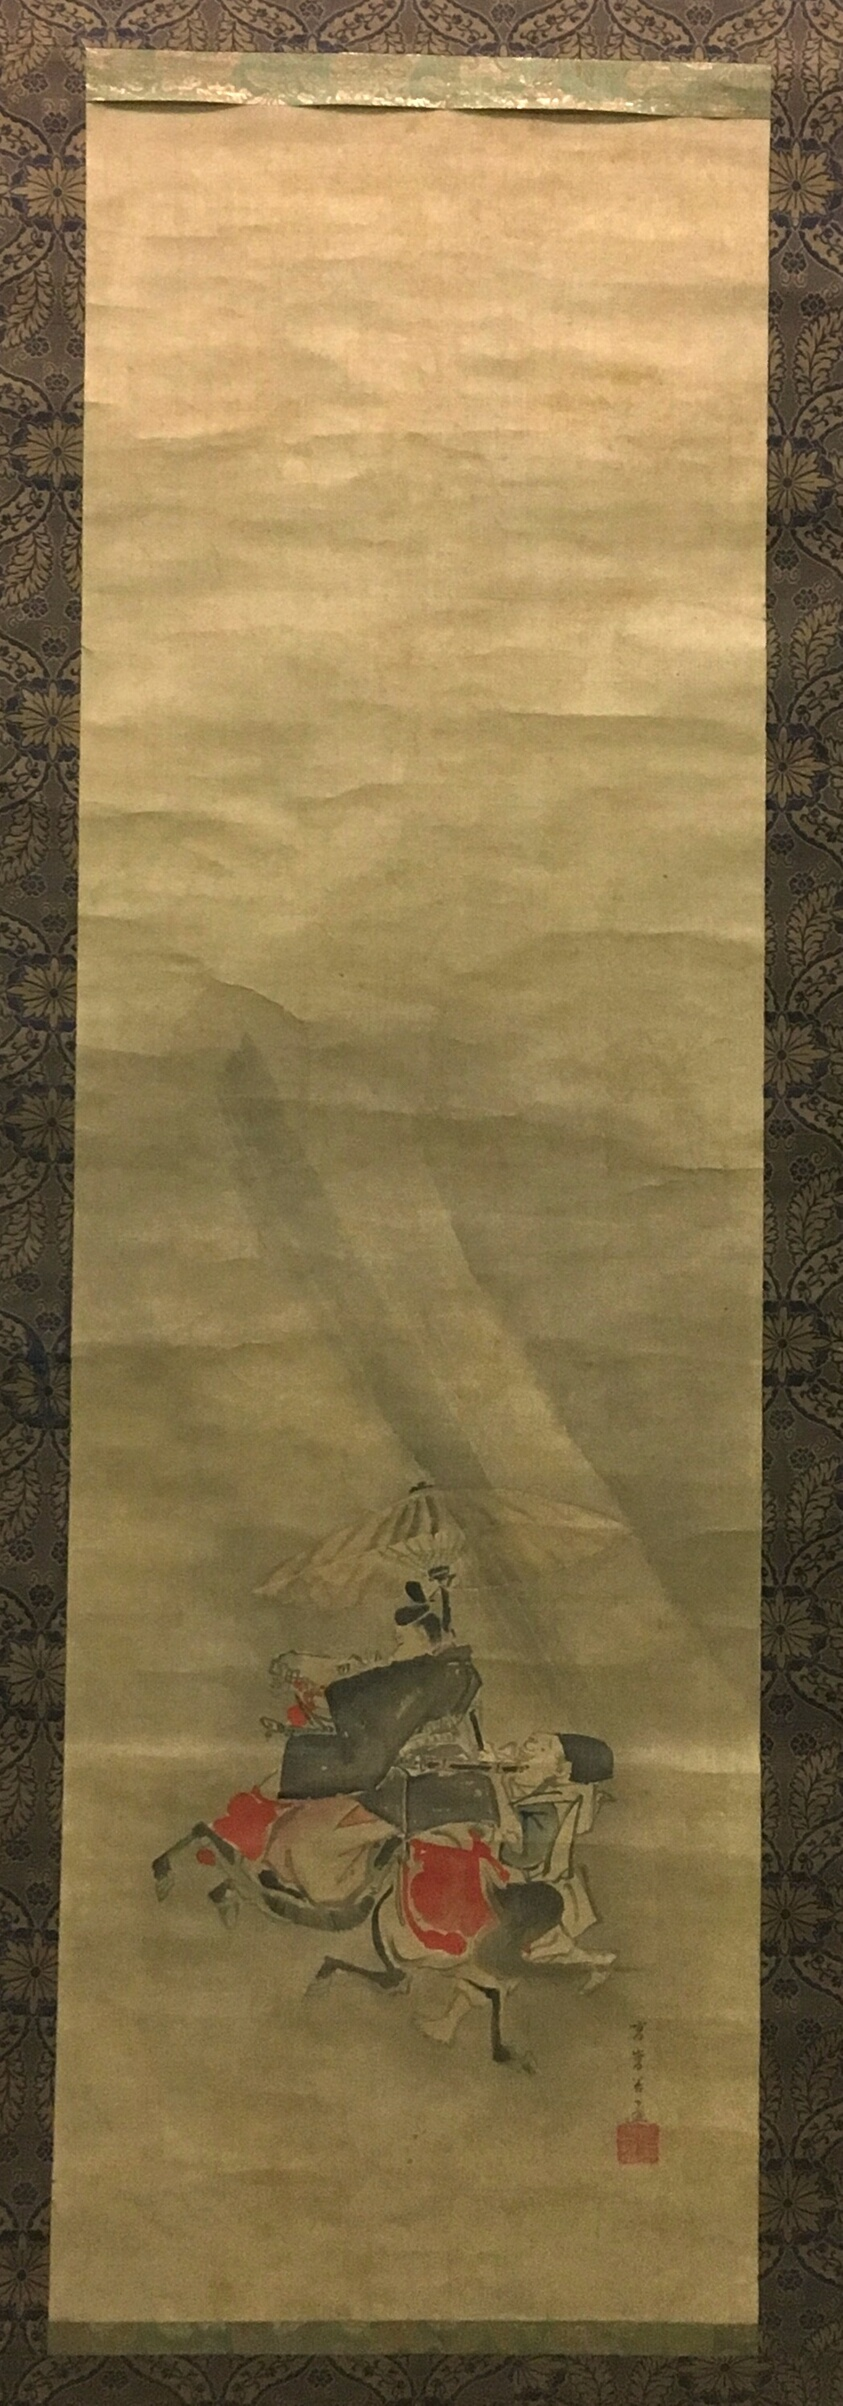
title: Ariwara no Narihira's Journey East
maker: Ko Sukoku; Japanese, 1730-1804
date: late 18th century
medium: One of a pair of hanging scrolls (with 1985.1); Ink and color on silk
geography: Japan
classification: hanging scroll; painting; asian art